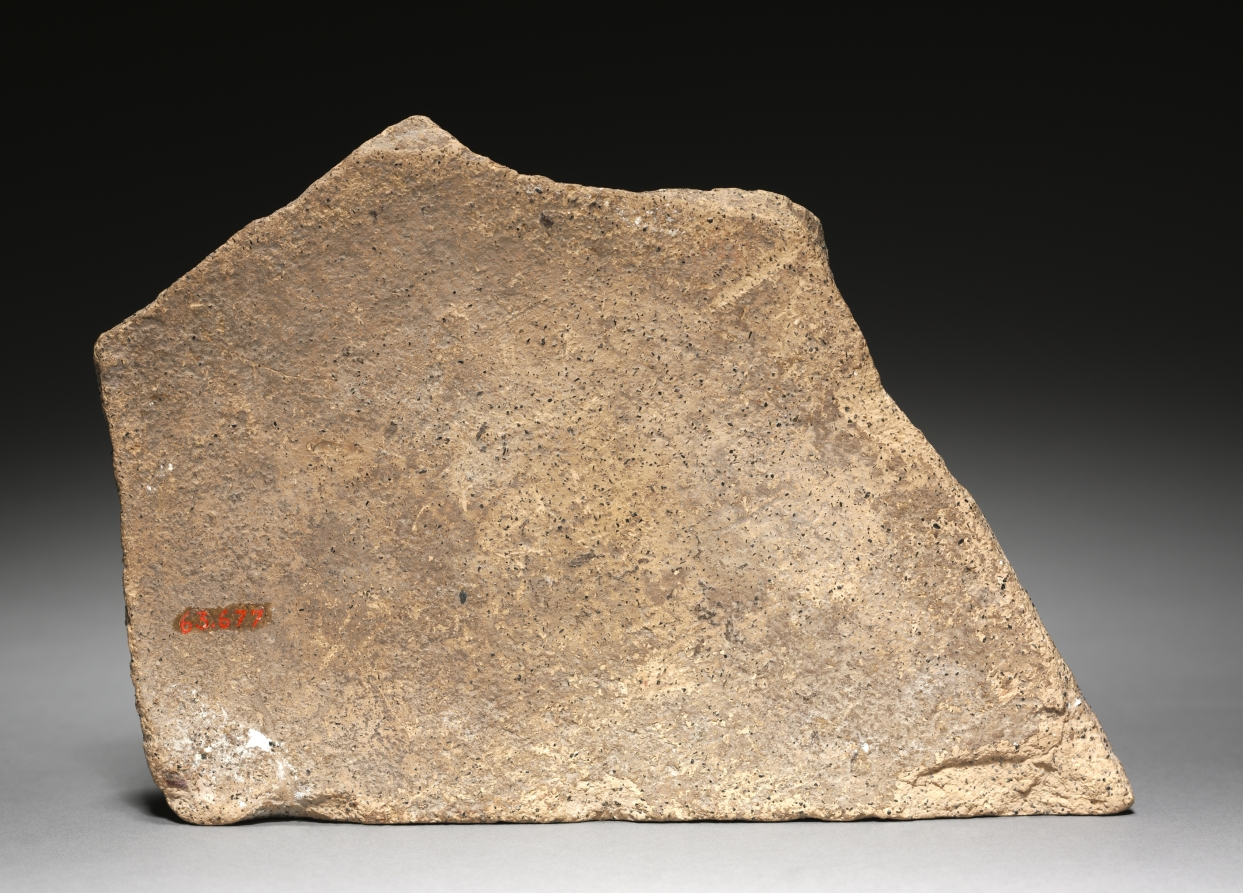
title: Plaque Fragment of Horses and Chariot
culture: Etruscan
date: 500–475 BCE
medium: terracotta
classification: Sculpture